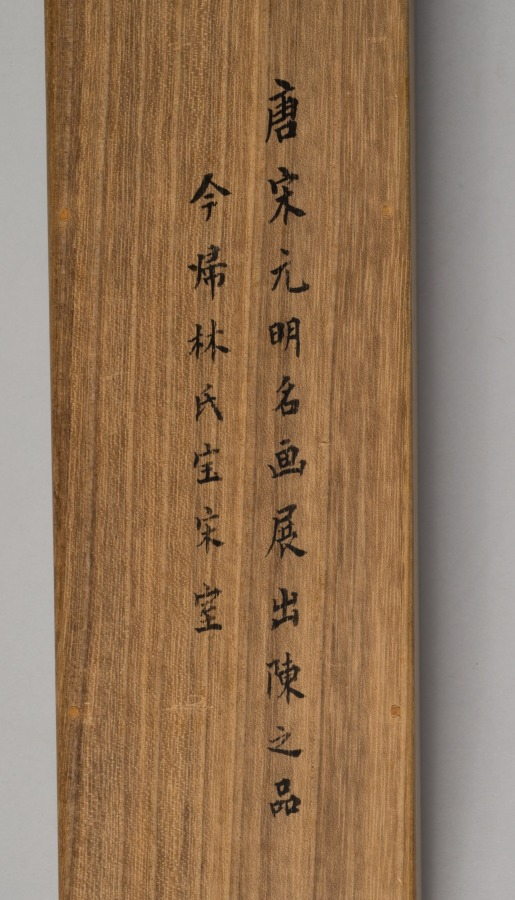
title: Playing the "Hand Game"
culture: Japan, Edo period (1615–1868)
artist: Hasegawa Yasumasa (Japanese)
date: c. 1760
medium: hanging scroll; ink and color on paper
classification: Painting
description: This scene depicts three people playing a game in which three players make hand gestures simultaneously. The relationship among the gestures determines the winner. Known as hand games, during the eighteenth century they were popular in Japan among courtesans. In this version, the contestants use both hands, indicating a special variation such as the fox hand game, which features gestures for a fox, a village leader, and a hunter.